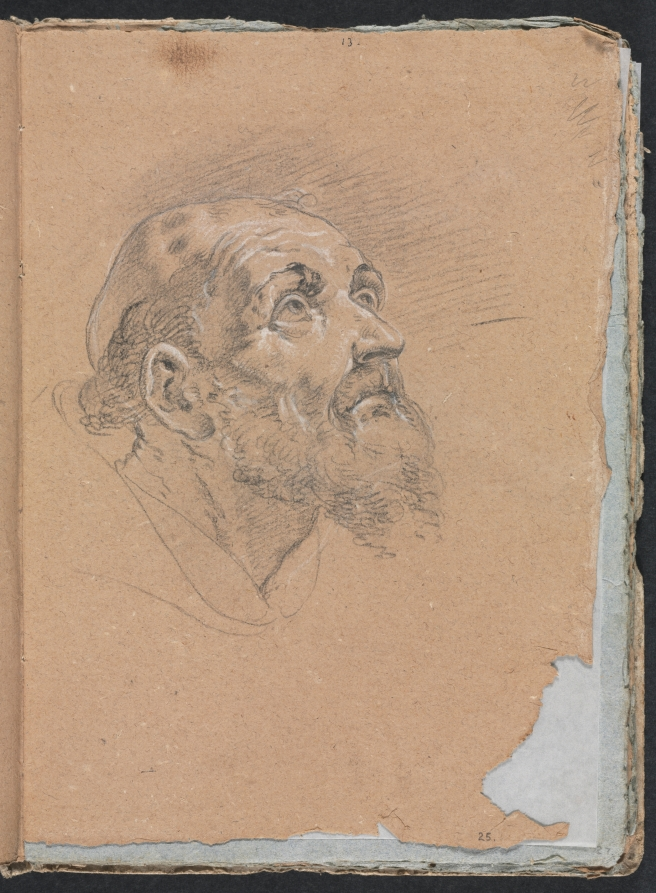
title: Verona Sketchbook: Monk (page 25)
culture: Italy, 18th century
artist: Francesco Lorenzi (Italian, 1723–1787)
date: 1760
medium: black chalk with white heightening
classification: Bound Volume